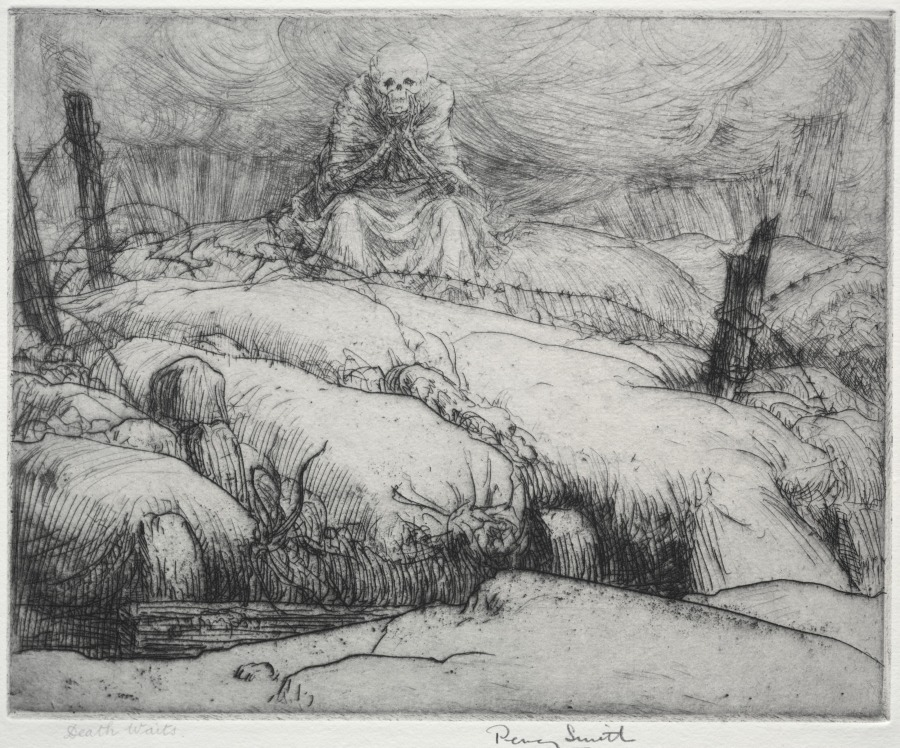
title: Dance of Death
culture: England, 20th century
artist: Percy John Delf Smith (British, 1882–1948)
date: 1919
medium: etching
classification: Print